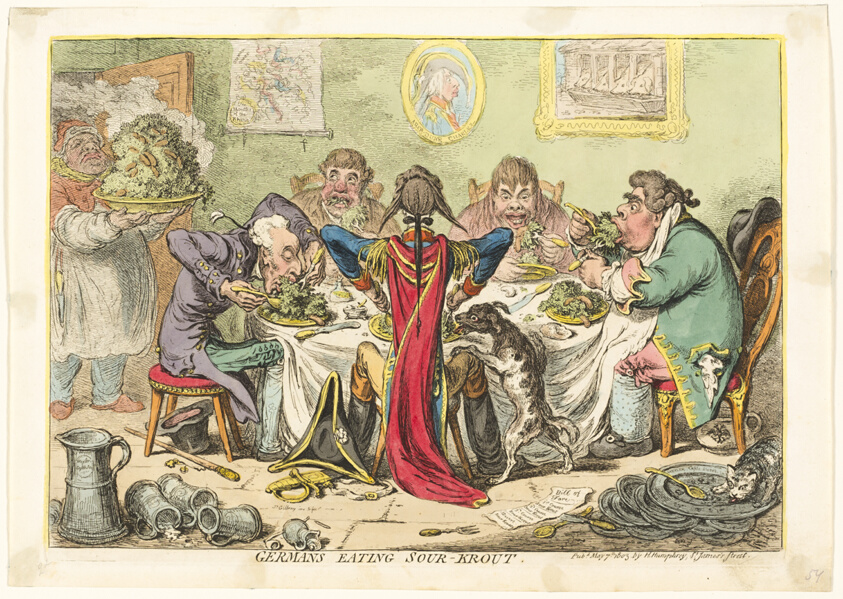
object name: Print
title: Germans Eating Sour-Krout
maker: James Gillray (English, 1756-1815); published by Hannah Humphrey (English, c. 1745-1818)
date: published May 7, 1803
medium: Hand-colored etching on paper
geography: England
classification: etching; print; prints and drawing